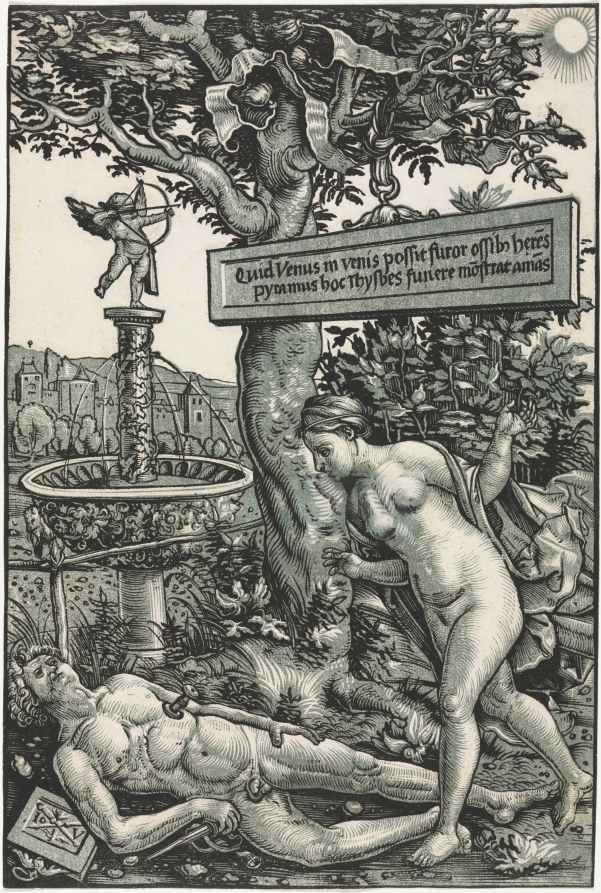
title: Pyramus and Thisbe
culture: Germany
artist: Hans Wechtlin (German, 1480/85–after 1526)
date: c. 1510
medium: chiaroscuro woodcut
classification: Print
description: In Metamorphoses, written by the Roman poet Ovid (43 BC–AD 17), the parents of Pyramus and Thisbe forbid them to marry, so the young lovers conspire to meet at a mulberry tree beside a spring. Thisbe arrives first, but flees when she sees a lion fresh from a kill. She accidentally drops her veil, which the lion bloodies while playing with it. When Pyramus arrives, he finds the bloody veil, falsely concludes that Thisbe had been killed, and plunges his sword into his side. Here, Thisbe discovers her dead lover. Wechtlin borrowed the figures of the star-crossed lovers from an engraving by Marcantonio Raimondi, but changed the natural spring into an ornamental fountain topped with a statue of cupid.